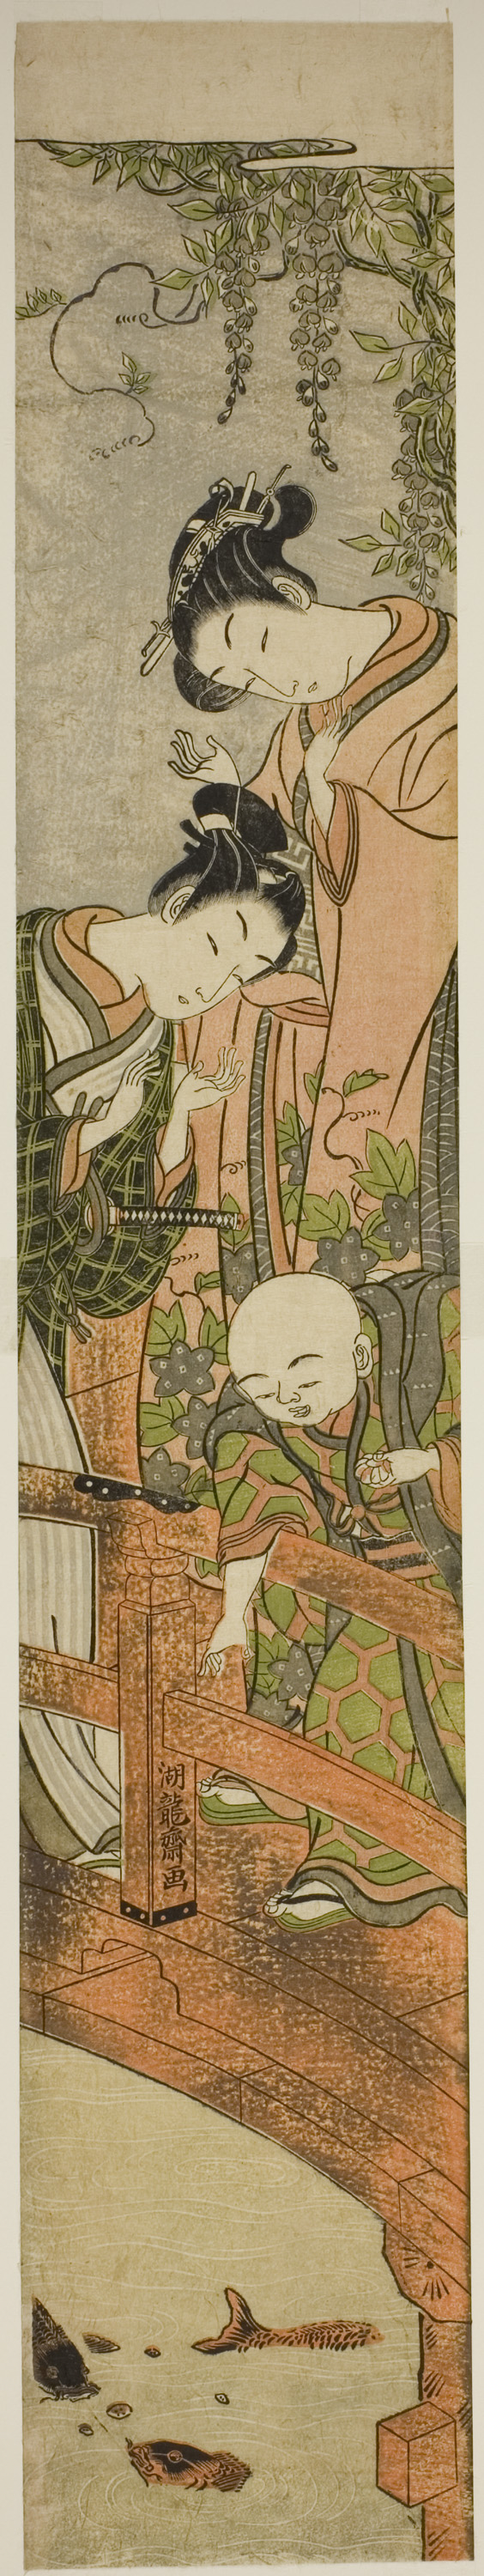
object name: Print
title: Feeding the Carp at Kameido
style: Japanese (culture or style)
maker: Isoda Koryusai (Japanese, 1735-1790)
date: c. 1771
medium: Color woodblock print; hashira-e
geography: Japan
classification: woodblock print; print; asian art